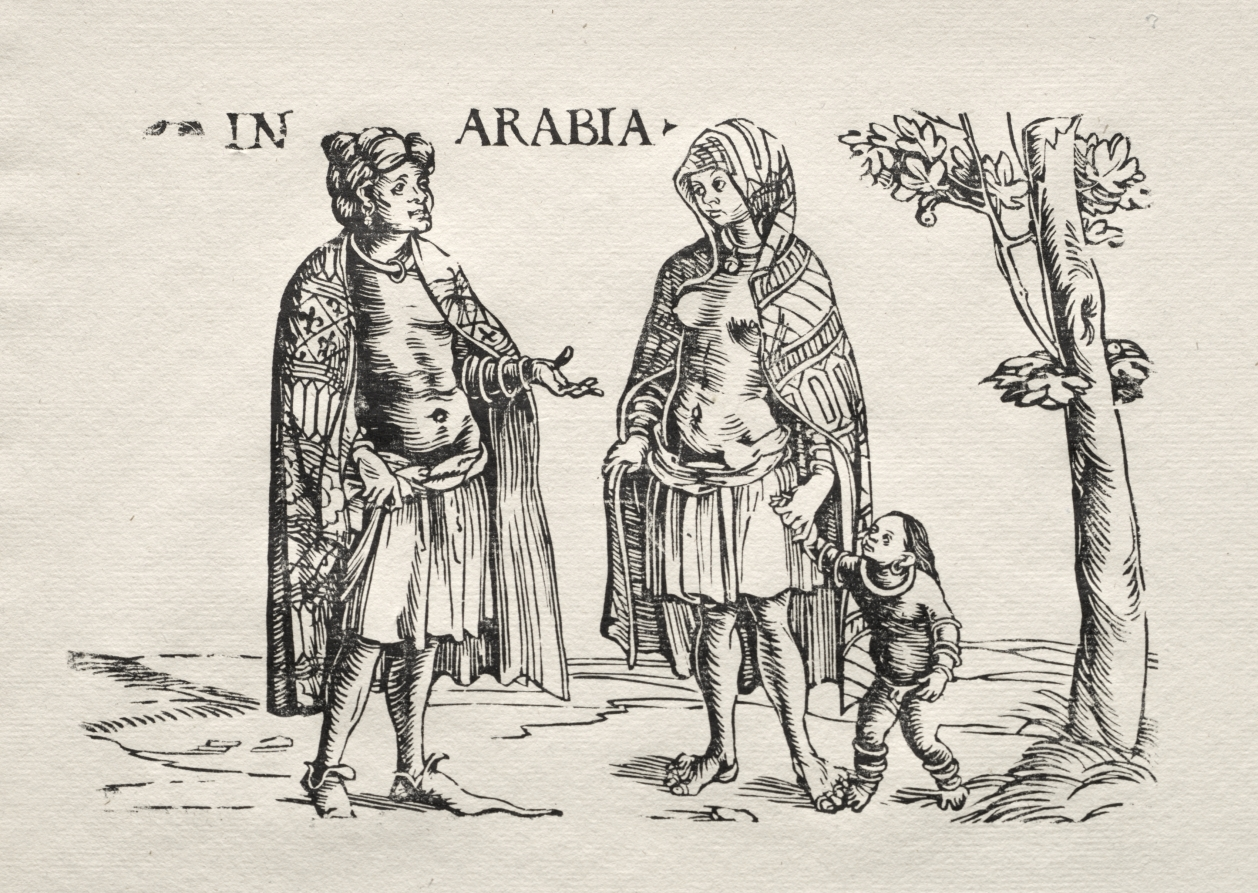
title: Natives of Arabia and the Indies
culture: Germany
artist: Hans Burgkmair (German, 1473–1531)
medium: woodcut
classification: Print